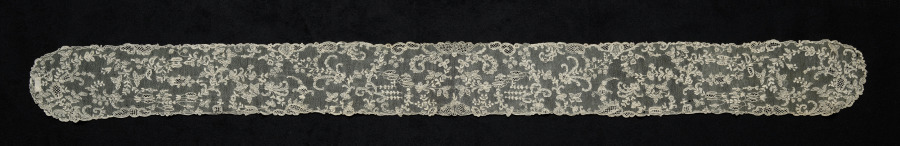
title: Lace Lappet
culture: France, Alençon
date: 1715–74 (Louis XV period)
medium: Linen: needle lace (Alencon lace)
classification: Lace